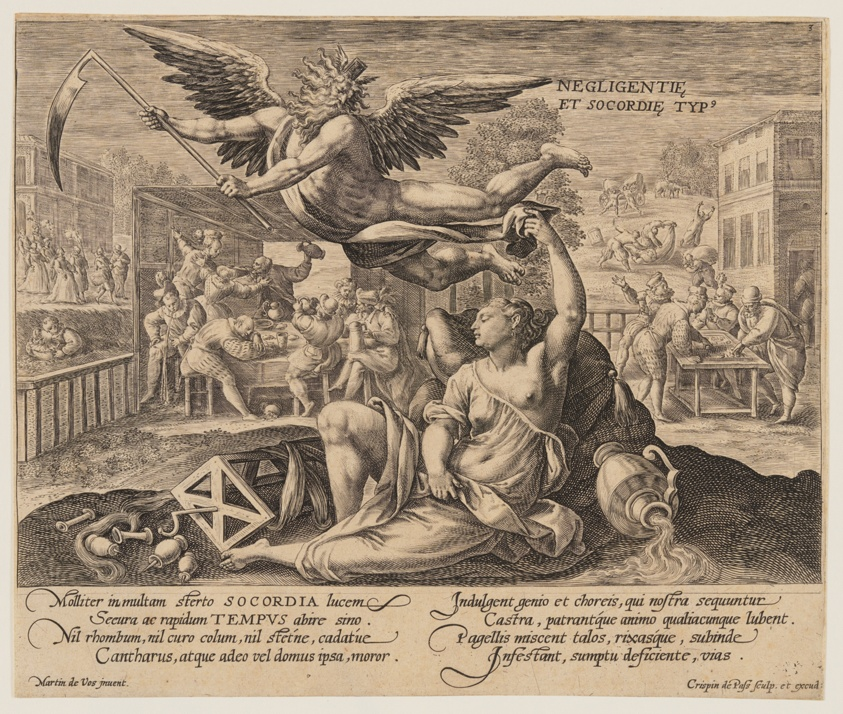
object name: Print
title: Negligentie et Socordie Typus, from Time with Virtues and Vices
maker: Crispijn van de Passe I (Dutch, c. 1565–1637); after Maarten de Vos (Flemish, 1532–1603)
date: c. 1600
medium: Engraving on ivory laid paper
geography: Netherlands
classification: engraving; paper; print; prints and drawing